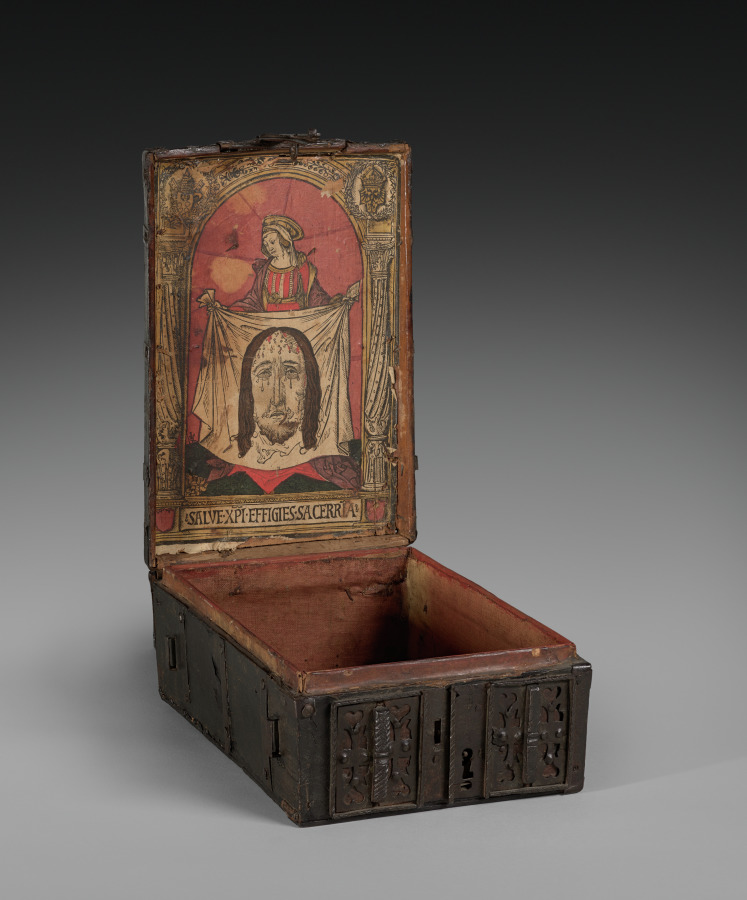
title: Coffret with Woodcut of Saint Veronica's Vernicle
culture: Coffret: France, probably Paris; Woodcut: Germany, Augsburg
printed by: Hans Burgkmair the Elder (German, 1473–1531)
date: Coffret: c. 1515; Woodcut: c. 1509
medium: Wood, leather, iron, textile, woodcut with stenciled coloring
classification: Print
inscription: SALVE. XPI. EFFIGIES. SACERRI[M]A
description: This remarkable object is thought to have functioned as a traveling case to keep small valuables and books, as well as a provisional altar. Made in France around 1515, the interior lid is affixed with a devotional woodcut made in Germany, imported, and colored for the purpose. Featuring an image of the veil of Saint Veronica, the text at the bottom of the woodcut guides the user in prayer to the holy image of Christ’s face which has been miraculously imprinted on the veil, an action that held promise of indulgences (a reduction in one’s punishment for sins). Presumably, the owner carried the box on a journey, retrieved a prayer book from inside, and propped it open in order to practice daily prayers.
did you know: A secret compartment on the top lid of this coffer may have held a relic, consecrated host, or valuable document.